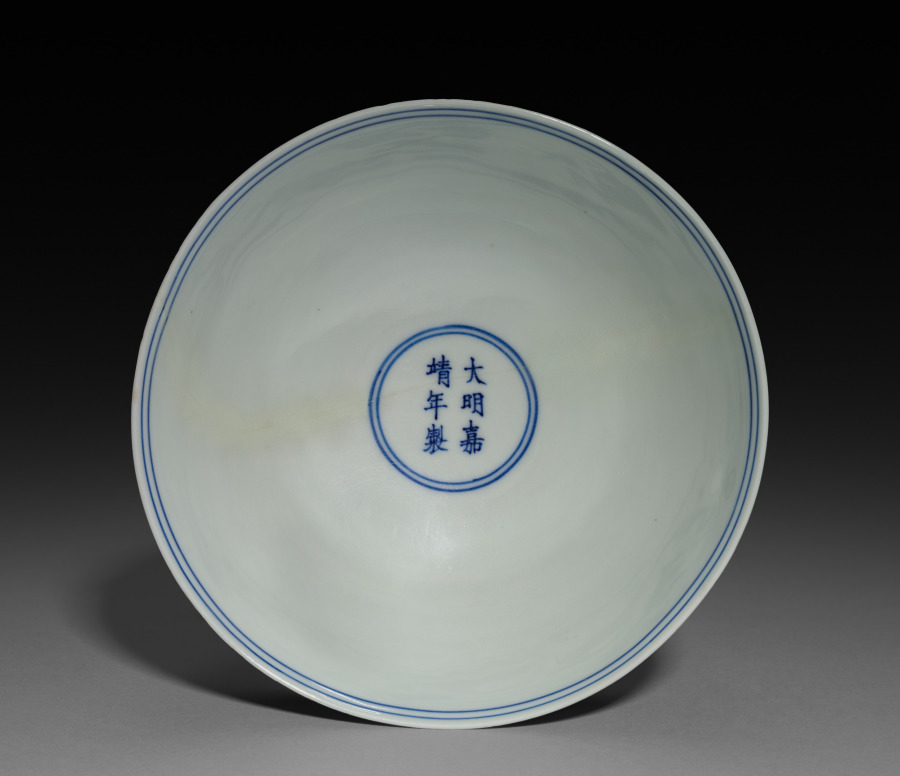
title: Bowl with Fish and Water Plants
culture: China, Jiangxi province, Jingdezhen kilns, Ming dynasty (1368-1644), Jiajing mark and reign (1522-66)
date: 1522–66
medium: porcelain with underglaze blue decoration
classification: Ceramic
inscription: 大明嘉靖年製